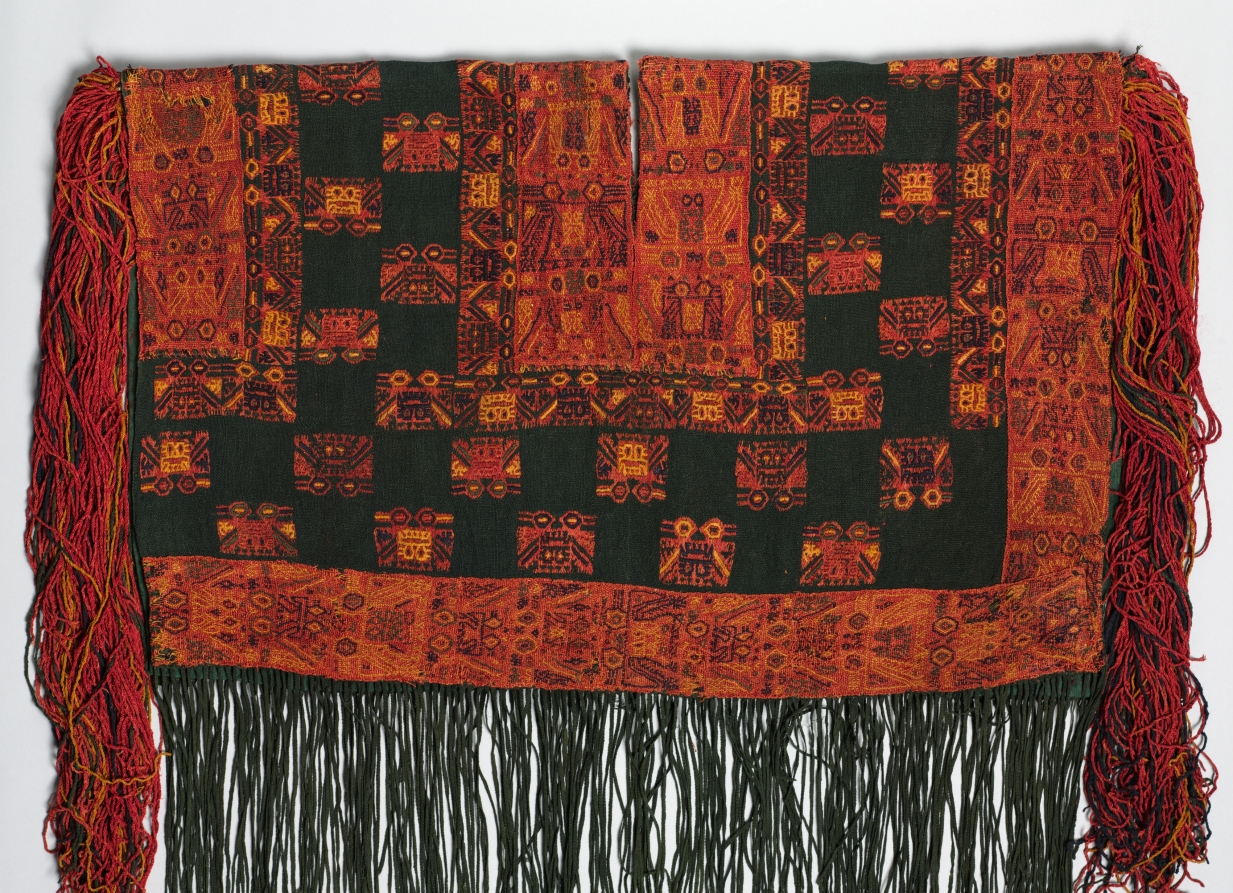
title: Tunic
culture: Peru, South Coast, Paracas (Cavernas) style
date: c. 300 BCE–200 CE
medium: Alpaca wool: plain weave with embroidery and warp substitution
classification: Textile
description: Brightly dyed wool yarns found in many ancient Peruvian textiles come mainly from alpacas that were domesticated and selectively bred to produce long, soft, lustrous fiber. The finely spun yarns in a broad range of colors as seen on this tunic—well preserved after approximately 2,000 years of burial—attest to the Paracas people’s considerable artistry. A double-headed bird motif appears multiple times throughout the tunic’s design.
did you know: Fine textiles were one of the most prestigious commodities in the ancient Andes.